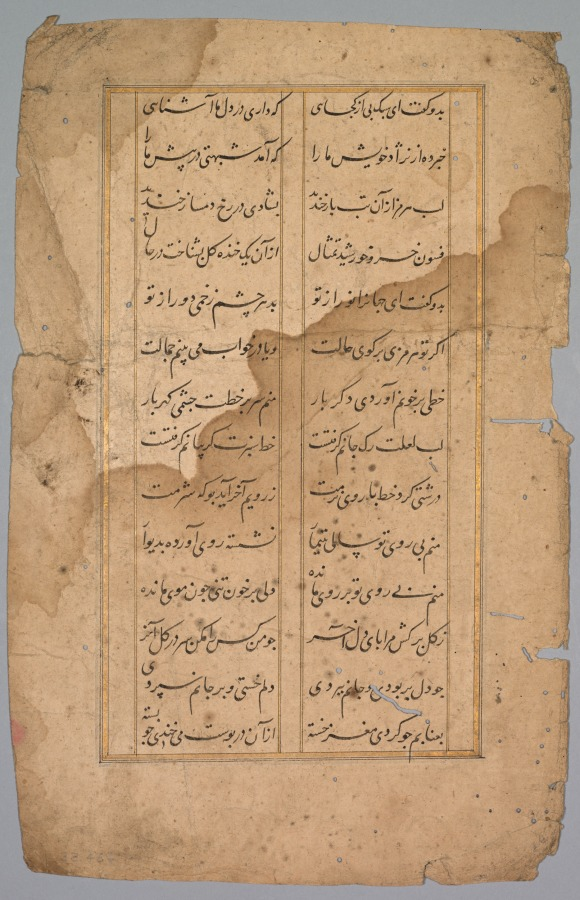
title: Page with Panel with Two Columns of Persian Writing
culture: India, Mughal Dynasty (1526-1756)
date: 18th century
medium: ink on paper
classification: Manuscript